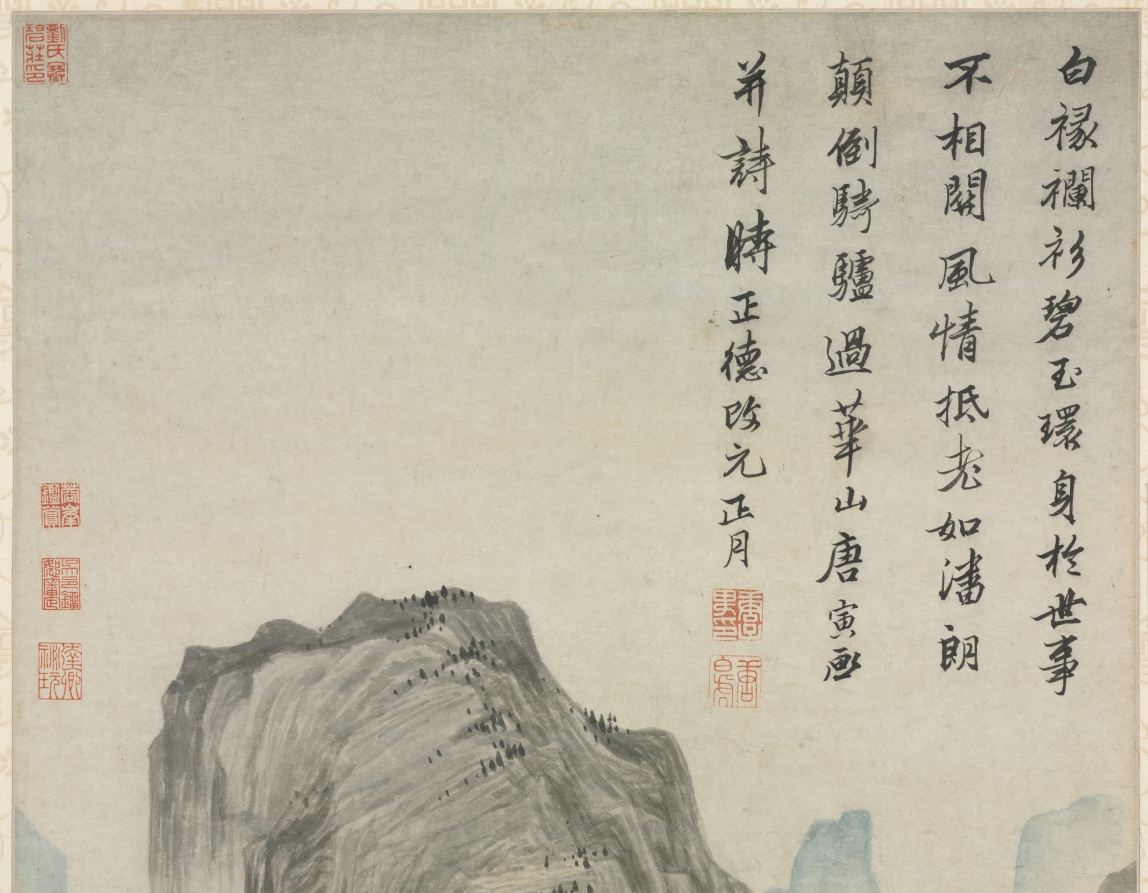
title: Mount Hua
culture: China, Ming dynasty (1368–1644)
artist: Tang Yin (Chinese, 1470–1523)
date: 1506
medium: hanging scroll; ink and light color on paper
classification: Painting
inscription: Artist's inscription, signature, and 4 seals: Wearing a white-bordered scholar's robe and green jade pendants, His life is unconcerned with worldly fame. Like P'an Lang resisting old age through high spirits, Crazy and clumsy he rides his donkey past Mount Hua. T'ang Yin painted this and composed the poem, the first month of the year of the Cheng-te era [1506]. [2 seals] T'ang Tzu-wei yin; T'ang. [2 seals, lower left corner] Po-hu T'ang Yin ssu yin; T'ang Chü-shih. trans. LYSL 12 additional seals: 2 of Wang Shan (1645-1728); 5 of Liu Shu (1759-1816); 1 of Yeh Ao (19th c.); 1 label and 2 seals of Lu Hui (1851-1920); 2 seals unidentified.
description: In this work, Tang Yin accumulates towering mountain summits in the manner of the Sung master, Li Tang, to capture the monumental presence of his subject. Tang Yin’s angular brushstrokes and ink washes of varied intensity give texture to the rocky surface and accent the play of light. Mount Hua is situated in southern Shaanxi province in North China. Hardly accessible during Tang Yin’s time, the mountains were frequented by immortality seekers to dwell or collect herbal drugs there. Tang Yin's potentially brilliant career was shattered in 1499 after he went to the capital to take the jinshi examination. He got entangled in a bribery case that caused him to spend seven years in prison. After his release, Tang returned to Suzhou, and settled on a career as a professional painter. One of Tang's few dated works, Mount Hua was painted seven years after this incident.